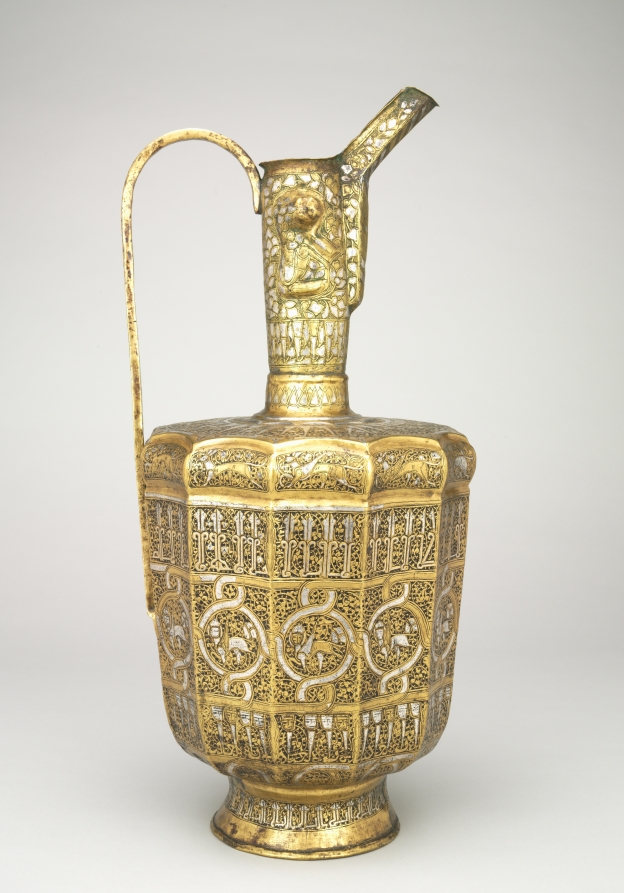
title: Twelve-sided Ewer with Sphinxes and Human-Headed Inscriptions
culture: Iran, Khurasan, Ilkhanid period (1256–1353)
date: 1300–1350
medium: hammered sheet of brass inlaid with silver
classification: Metalwork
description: The spout and neck of the ewer display a crouching and seated lion in raised relief. Winged hare-like animals march around the top of the body, set off by foliate scrolls, while sphinxes process around the center. The bottom of the ewer’s body is encircled by an inscription with human heads, which only appear on metalwork in Islamic art. Ewers like this, and similar elaborate vessels, would have been used in court banquets and elite homes across the Islamic world.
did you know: Calligraphy with human heads, known as animated script, developed in northeast Iran during the 1100s.